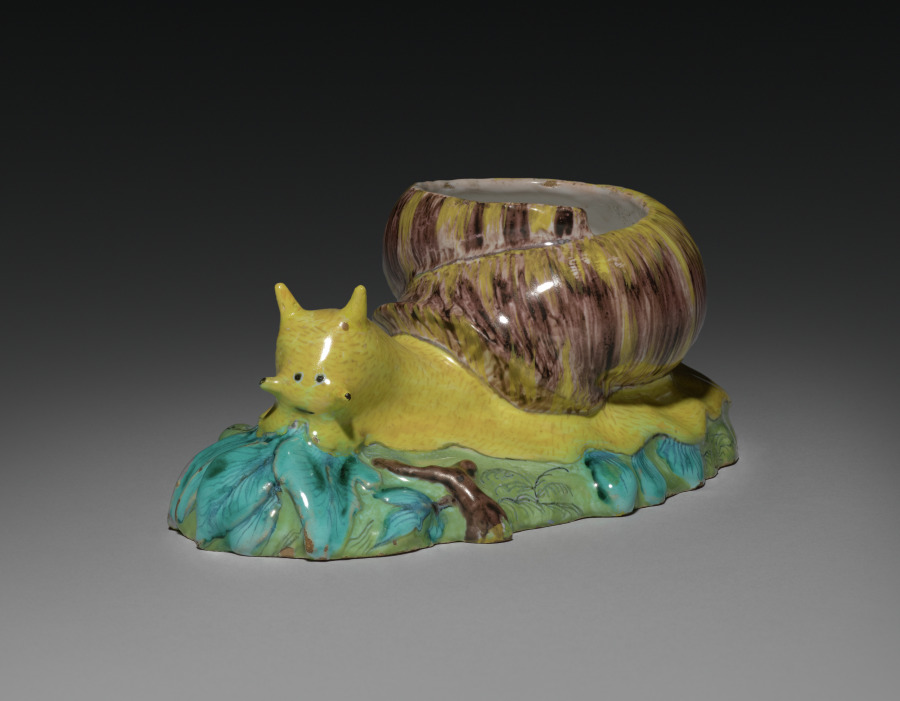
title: Box in the Form of a Snail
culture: France, 18th century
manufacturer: Strasbourg Factory (France)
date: c. 1750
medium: faience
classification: Ceramic